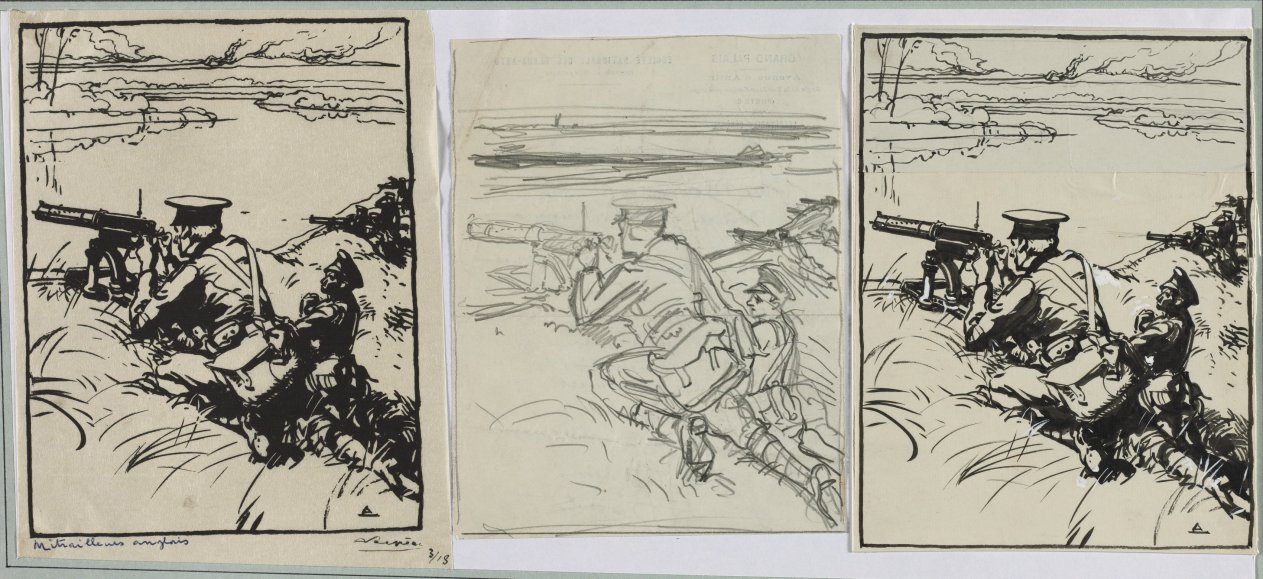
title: Mitrailleurs anglais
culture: France, 20th century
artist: Auguste Louis Lepère (French, 1849–1918)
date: 1914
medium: brush and black ink over pencil with white highlights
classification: Drawing